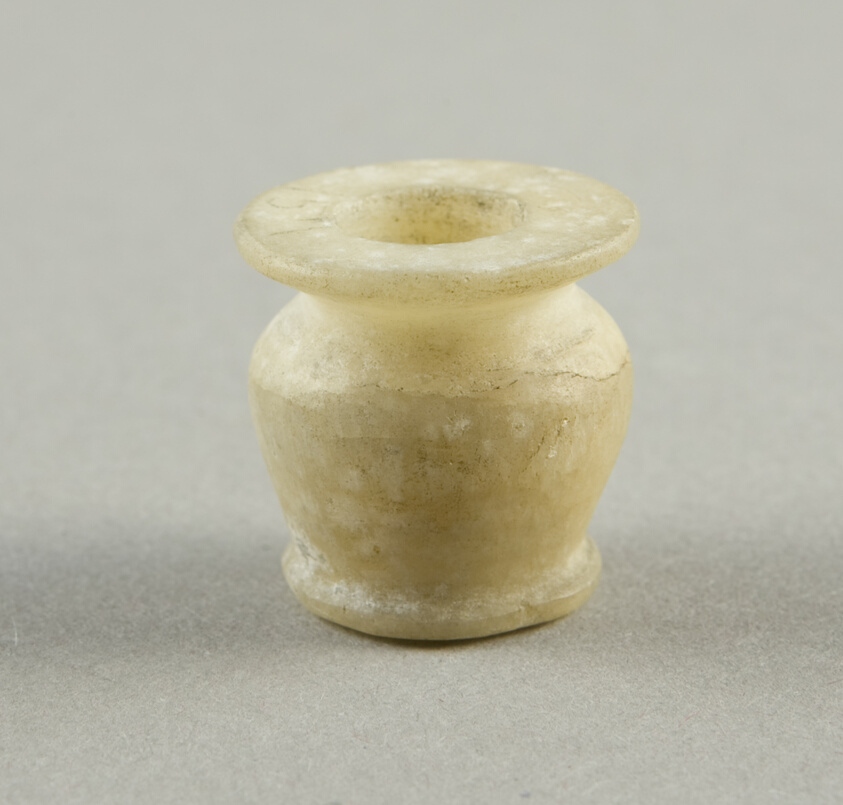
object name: Vessel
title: Kohl Jar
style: eighteenth dynasty, egyptian, new kingdom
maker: Egyptian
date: New Kingdom, Dynasty 18 (about 1550–1295 BCE)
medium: Travertine (Egyptian alabaster)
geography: Egypt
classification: personal grooming / hygiene / cosmetic container; vessel; ancient art; container